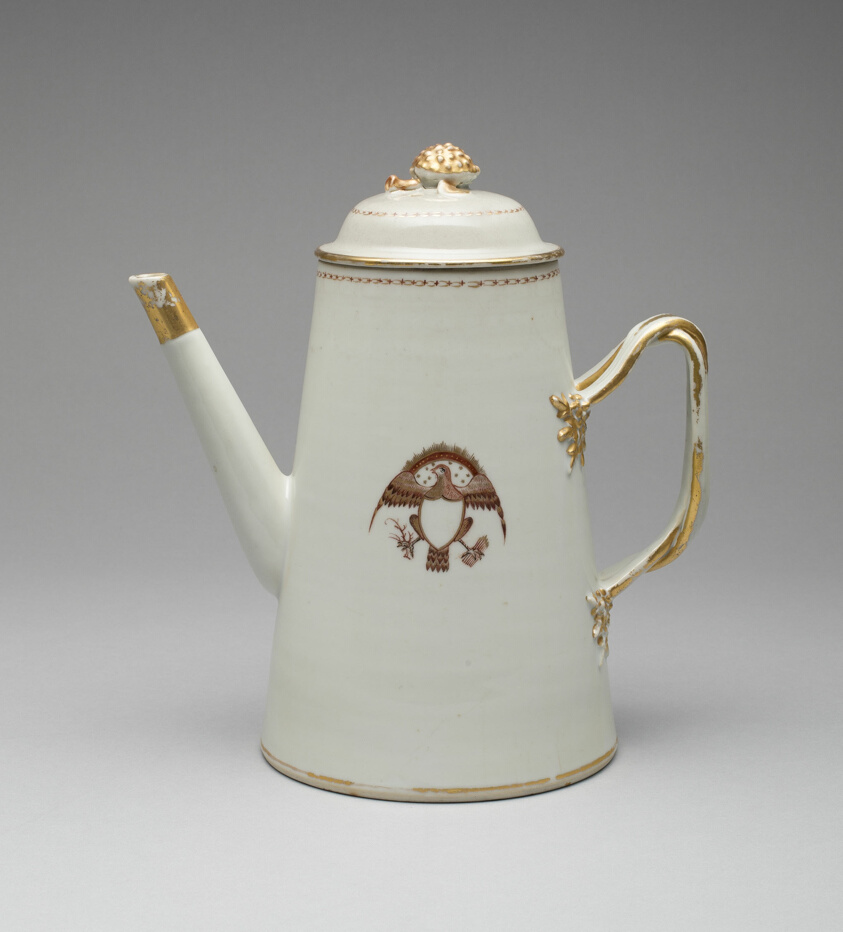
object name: Ceramics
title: Coffee Pot with Cover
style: chinese export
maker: Artist unknown (Chinese, made for the American market); China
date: c. 1795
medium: Porcelain, enamels, and gliding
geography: China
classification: coffeepot; art of the americas; porcelain; ceramics; decorative arts; American market; chinese export porcelain; pottery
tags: eagle with shield